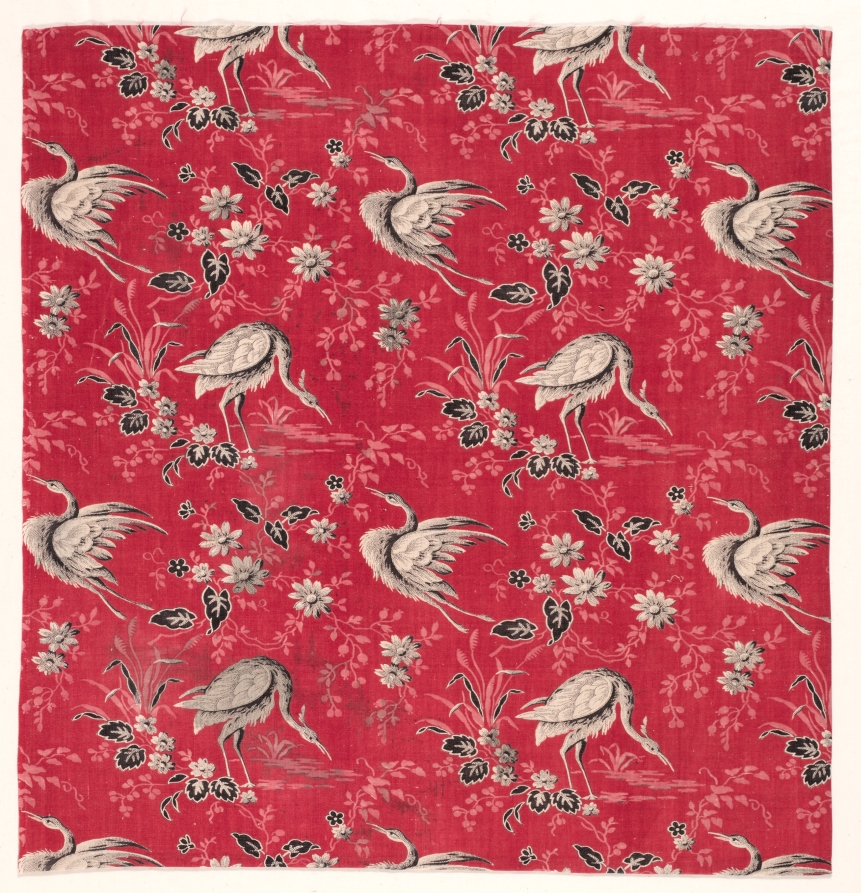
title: Roller-Printed Cotton with Heron and Flower Design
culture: England, 19th century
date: 1800s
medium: roller printed cotton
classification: Textile